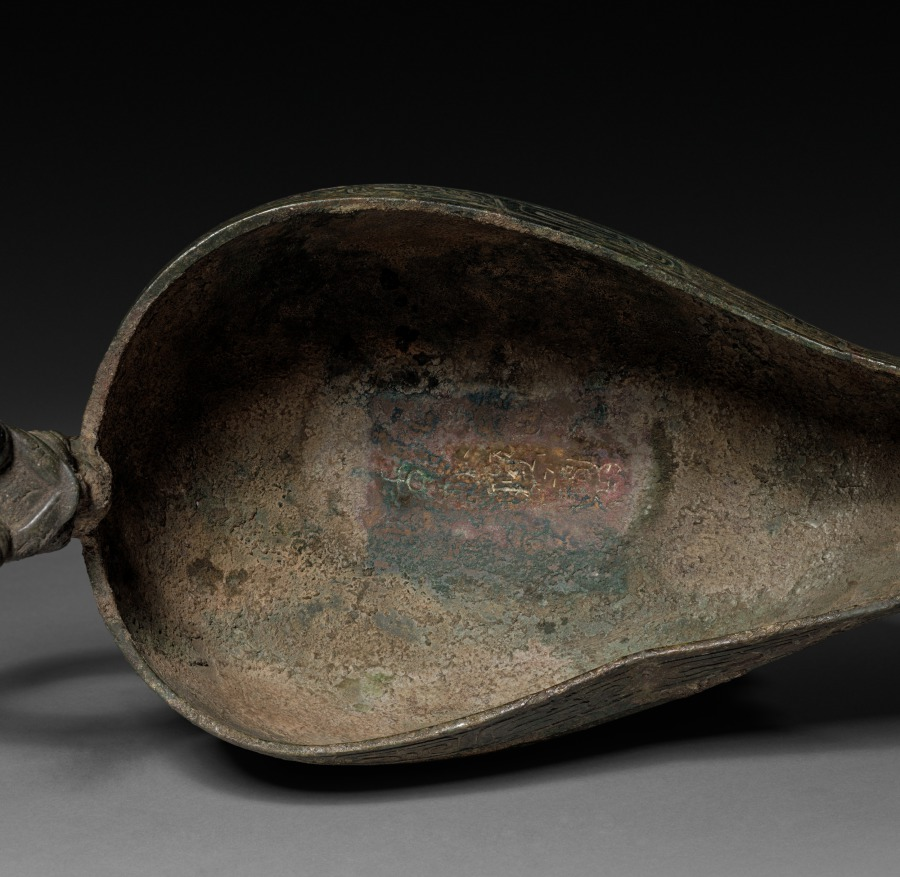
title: Yi: Libation Vessel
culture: China, Zhou dynasty (c. 1046–256 BCE)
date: c. 900–600 BCE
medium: bronze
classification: Metalwork